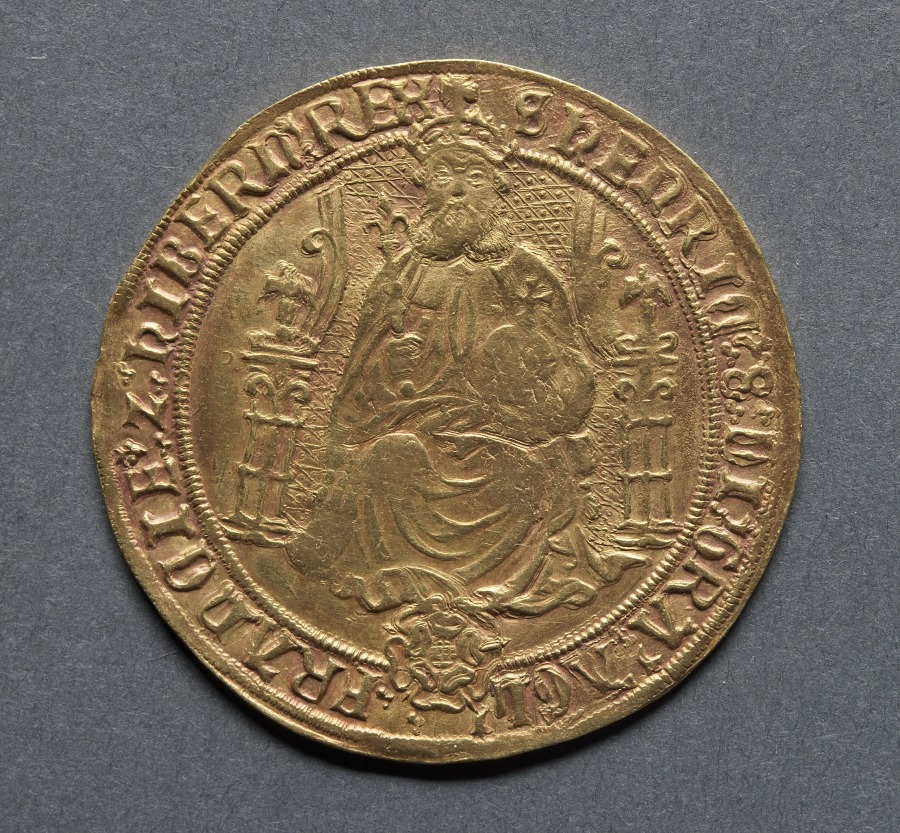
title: Sovereign: Henry VIII (obverse); Crowned Shield of Arms (reverse)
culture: England, Henry VIII, 1509-1547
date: 1544–47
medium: gold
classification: Coins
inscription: HENRIC. 8. DI. GRA. AGL FRNCIE Z. HIBERNIE REX.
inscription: IHS. AVTEM TRANSIENS PER MEDIVM ILLORVM IBAT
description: This is an example of the late, debased, third coinage of Henry VIII. Knowing how coinage had been debased in the past, Henry VIII did so again for his own personal benefit. He not only debased the gold coinage but the silver as well. This coin was struck at Southwark mint. The Southwark mint was in Suffolk Place, Southwark being immediately south of London Bridge. The mint was opened in June 1545, along with those of Canterbury, Durham House, Bristol, and York.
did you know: This coin was struck during the end of Henry VIII's reign which ended in 1547 and lasted for 38 years.